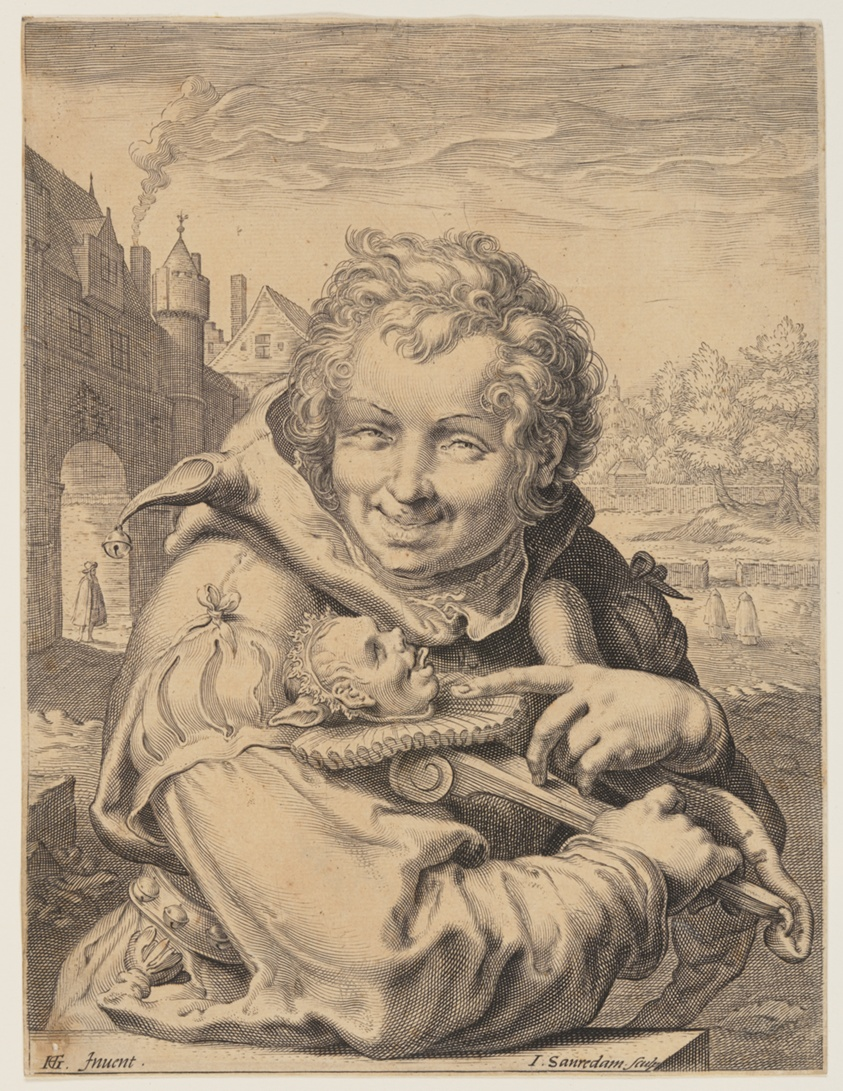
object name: Print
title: Fool Holding a Staff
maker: Jan Saenredam (Dutch, 1565–1607); after Hendrick Goltzius (Dutch, 1558–1617)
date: c. 1595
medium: Engraving on ivory laid paper, discoloured to cream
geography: Netherlands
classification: engraving; paper; print; prints and drawing